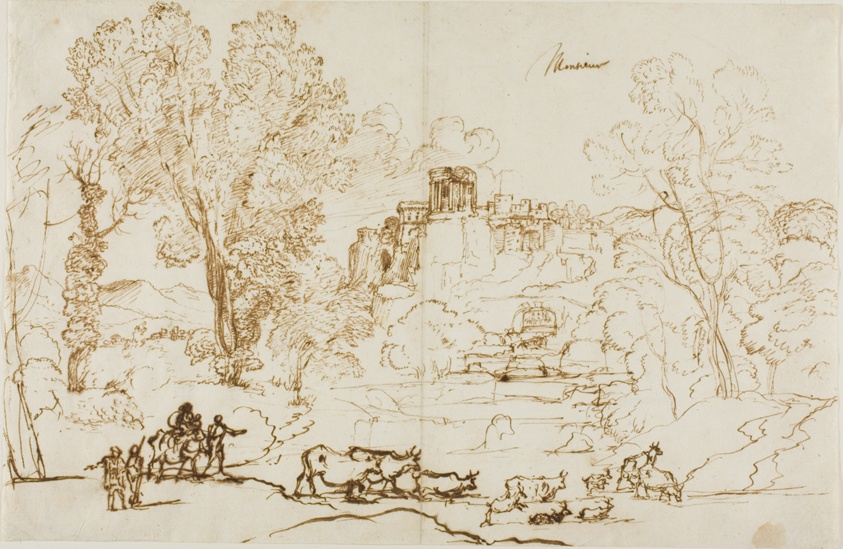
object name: Drawing and Watercolor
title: Classical Landscape - Tivoli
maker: Claude Lorrain (French, 1600-1682)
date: 1636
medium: Pen and ink on paper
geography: France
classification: pen and ink drawings; drawings (visual works); prints and drawing